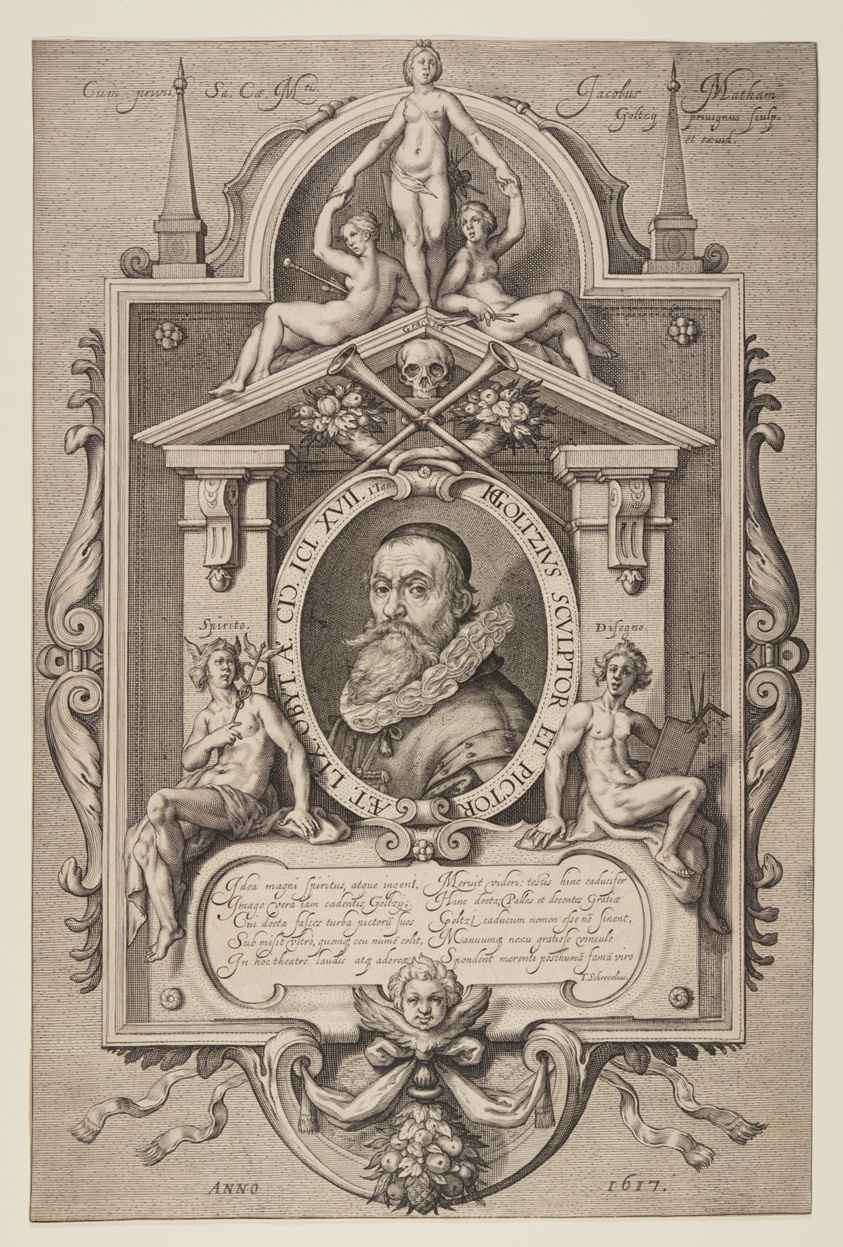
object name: Print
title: Hendrick Goltzius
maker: Jacob Matham (Dutch, 1571–1631); after Hendrick Goltzius (Dutch, 1558–1617)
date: 1617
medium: Engraving on ivory laid paper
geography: Netherlands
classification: engraving; paper; print; prints and drawing